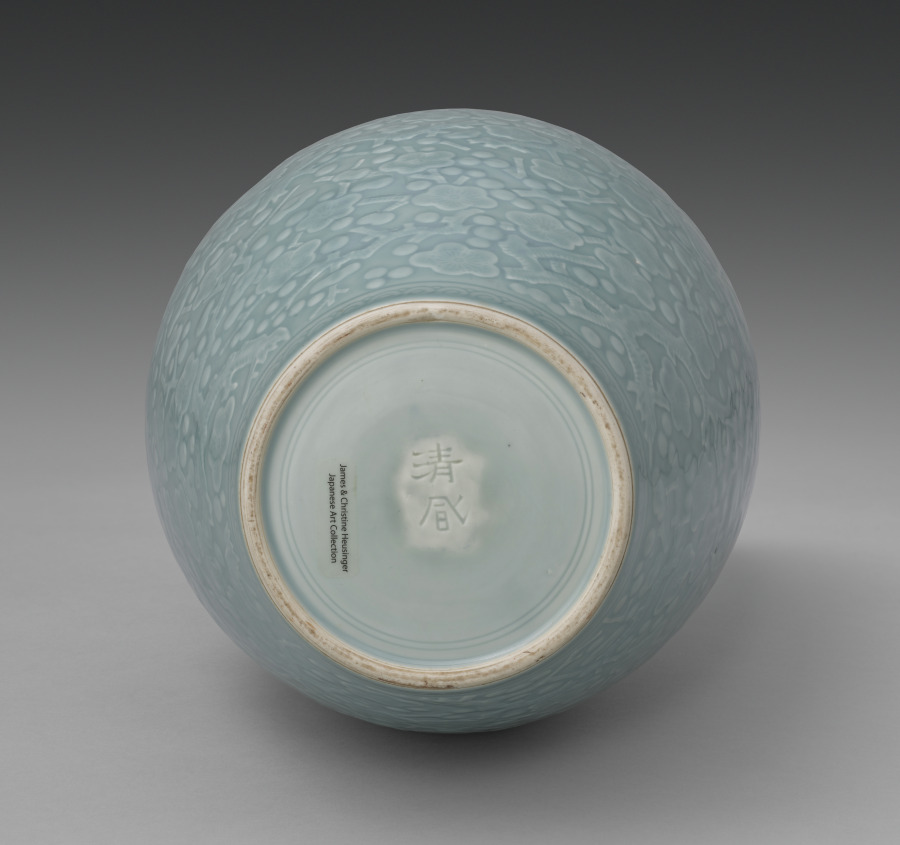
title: Vase with Plum Blossoms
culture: Japan, Taishō period (1912–26) or Shōwa period (1926–89)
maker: Seifū Yohei IV (Japanese, 1872–1951)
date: 1914–46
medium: Glazed porcelain with molded and carved design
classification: Ceramic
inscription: 清風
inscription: "James & Christine Heusinger/ Japanese Art Collection"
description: Although inspired by representations of flowering plum, or prunus, in Chinese ceramics, the dense allover design of branches on this vase also resembles Japanese textile patterns. As they might on a kimono, the trunks run in alternate directions up and down the surface. At the foot, or bottom of the vase, is a classic band of spirals, and at the neck, or narrowed portion near the opening, is a collar of clouds.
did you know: Yohei IV’s allover design of budding and flowering plum blossoms, strongly associated with spring and with China, is combined with his father’s “water color” glaze on this vase.